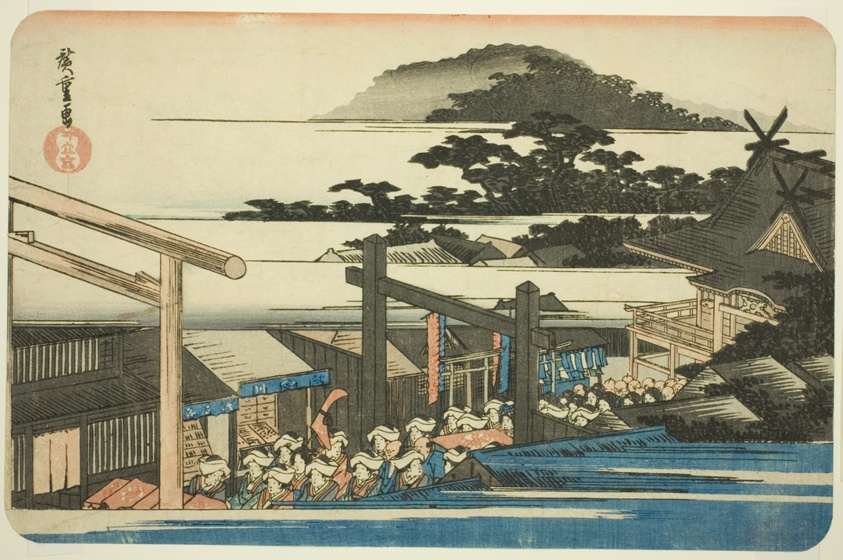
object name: Print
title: Precincts of the Shiba Shinmei Shrine (Shiba Shinmei keidai), from the series "Famous Places in the Eastern Capital (Toto meisho)"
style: Japanese (culture or style)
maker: Utagawa Hiroshige 歌川 広重; Japanese, 1797-1858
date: c. 1832/38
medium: Color woodblock print; oban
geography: Japan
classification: woodblock print; print; asian art